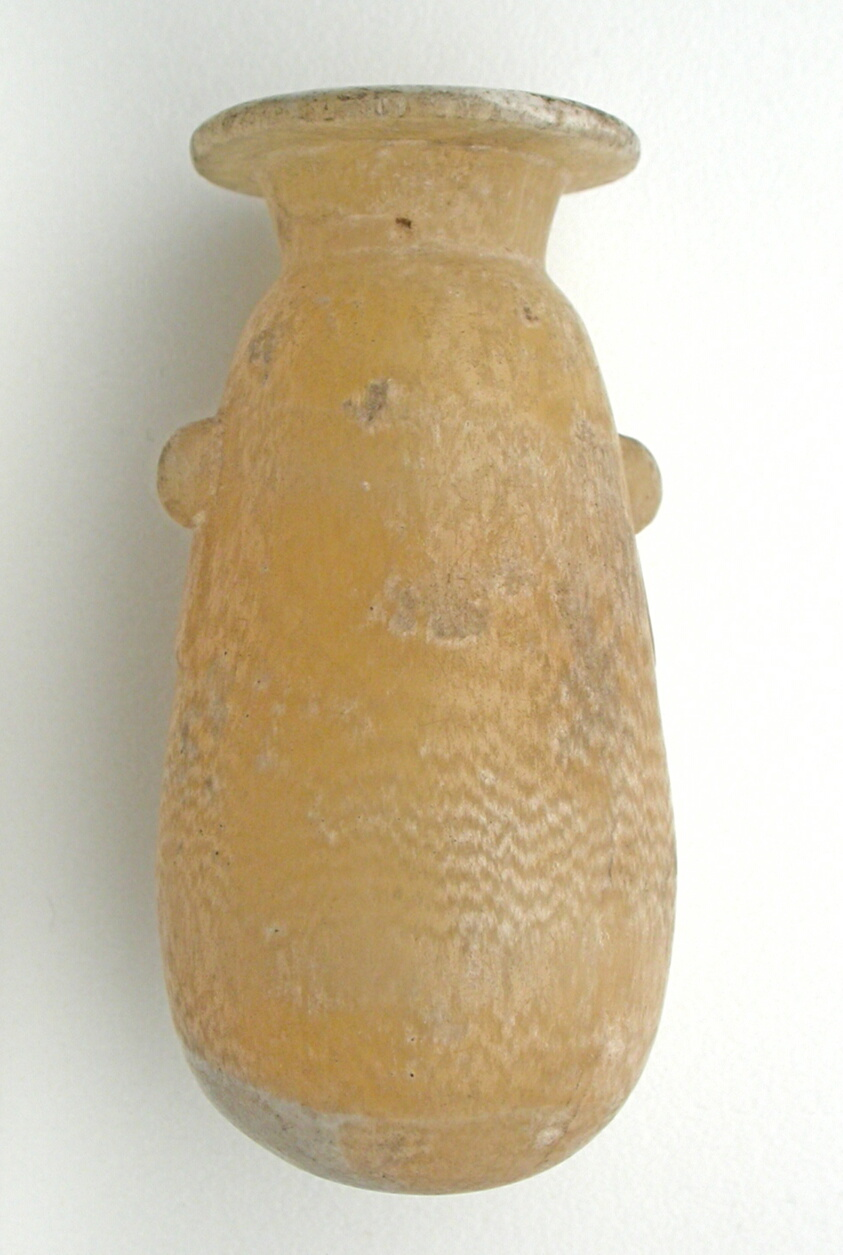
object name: Vessel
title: Alabastron (Container for Scented Oil)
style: egyptian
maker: Egyptian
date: Late Period, Dynasty 26–31 (?) (664–332 BCE)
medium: Travertine (Egyptian alabaster)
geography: Egypt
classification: alabastron; stone; vessel; ancient art